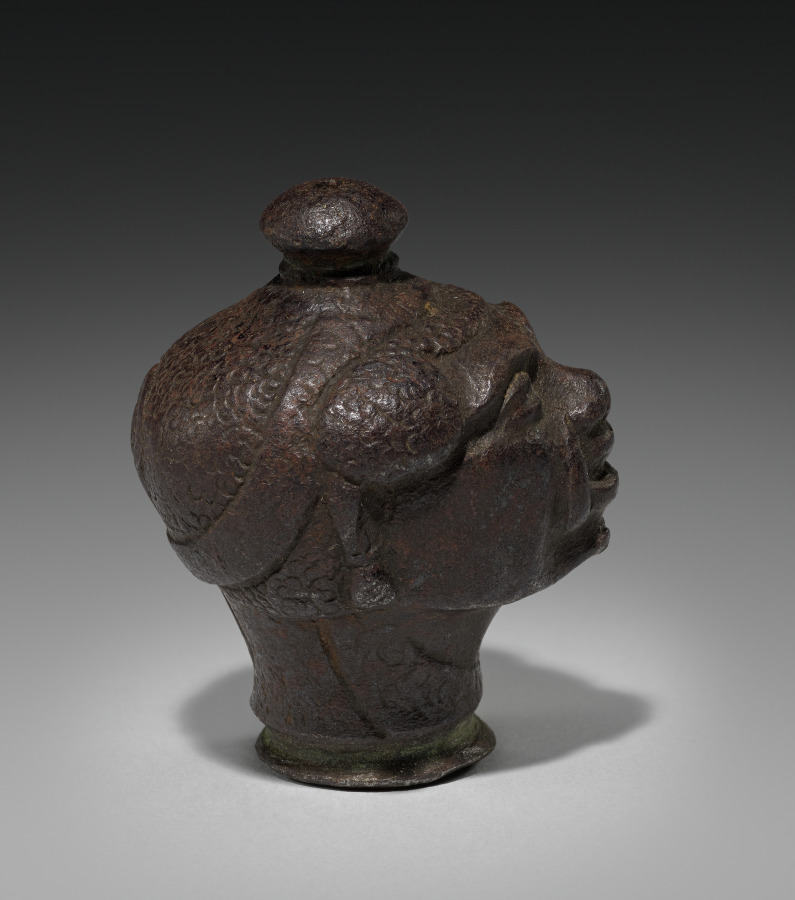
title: Pommel of Sword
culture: Italy, 17th century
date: 1600s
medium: steel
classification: Arms and Armor